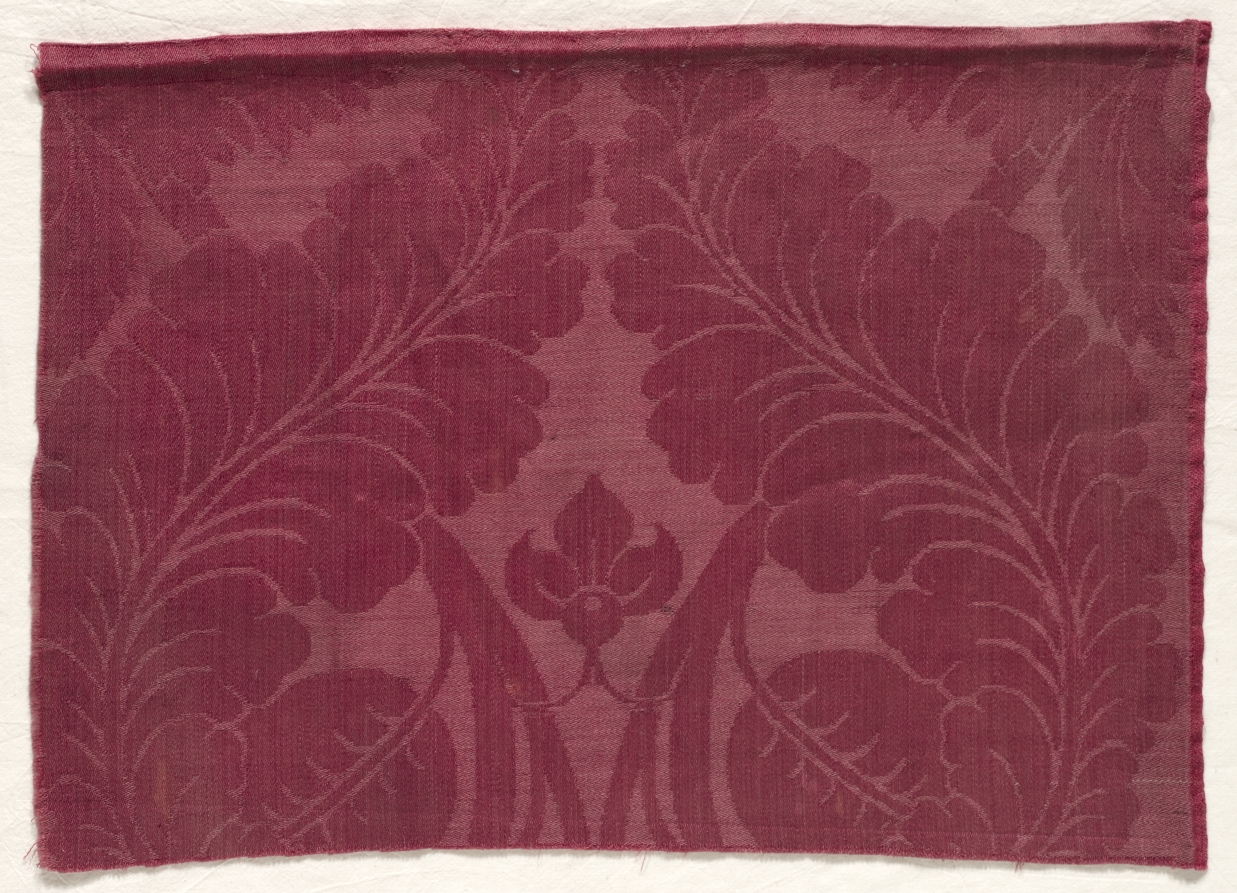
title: Damask with Leaf and Floral Design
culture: England, 18th-19th century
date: 1700s - 1800s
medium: damask; wool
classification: Textile